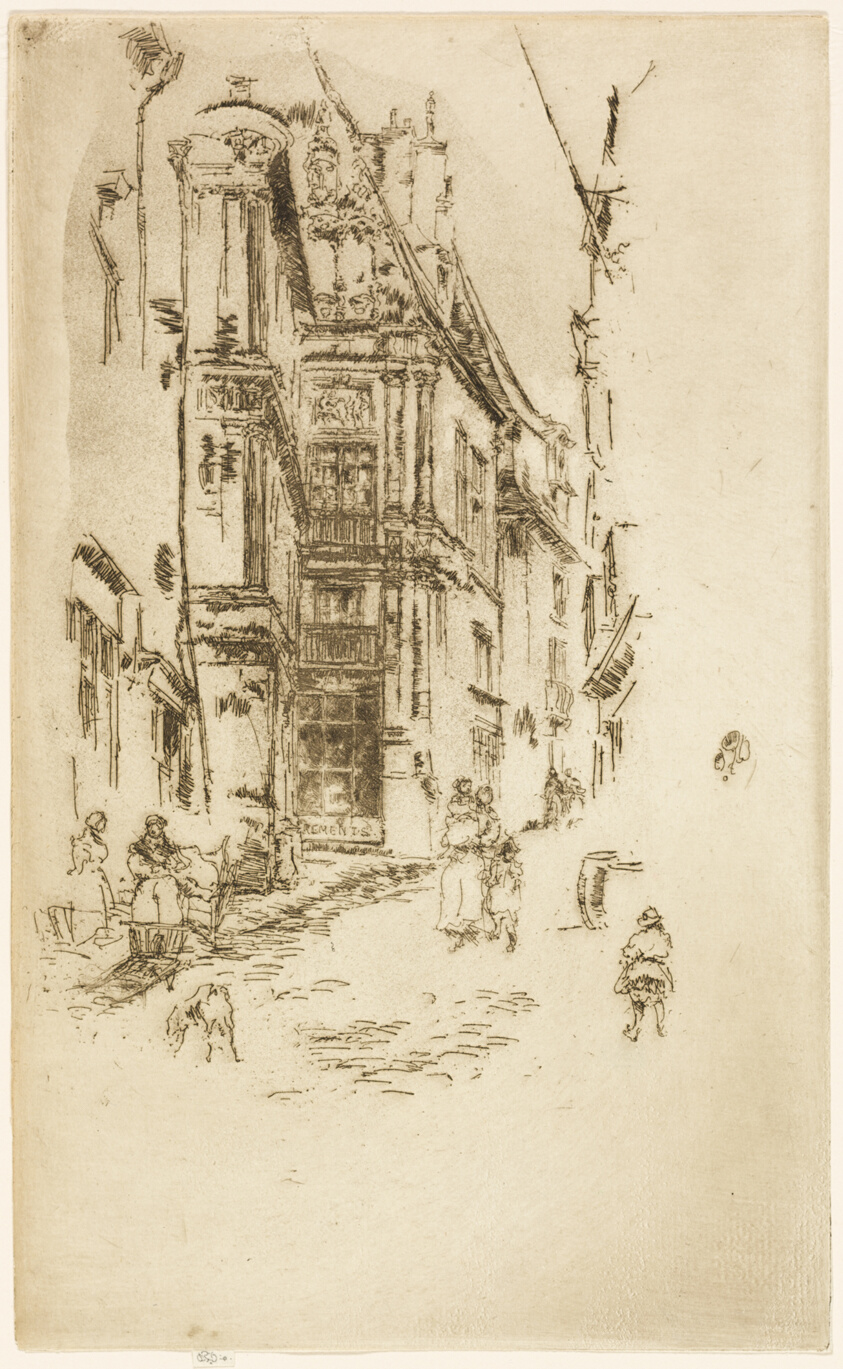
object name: Print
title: Chancellerie, Loches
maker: James McNeill Whistler (American, 1834-1903)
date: 1888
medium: Etching with foul biting in black ink on cream laid paper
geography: United States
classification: etching; foul biting; print; prints and drawing; paper